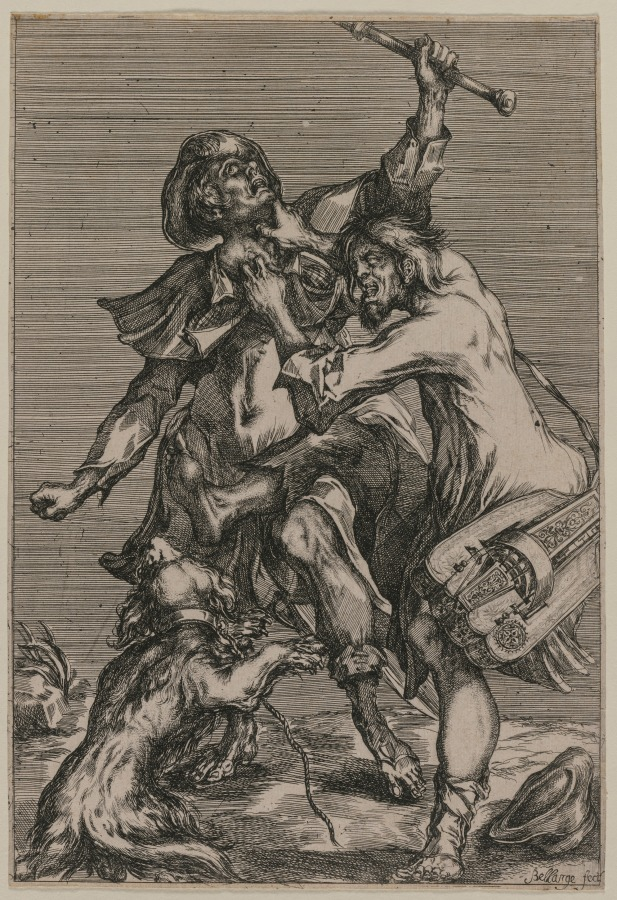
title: Two Beggars Fighting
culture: France, 17th century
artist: Jacques Bellange (French, c. 1575–1616)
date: 1610–20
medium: etching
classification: Print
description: Since antiquity, music was considered to inspire two different effects: it could elevate the soul to spiritual thoughts, or arouse passions both violent and sensual. In this genre scene, two transients engage in an epic struggle. The hurdy-gurdy, slung across the body of one of the vagabonds, was considered a "base" instrument whose melodies heated the senses without uplifiting the spirit. In his Syntagma Musicum of 1618, the musical theorist Michael Praetorius dubbed the hurdy-gurdy a "fiddle for peasants and loose women."